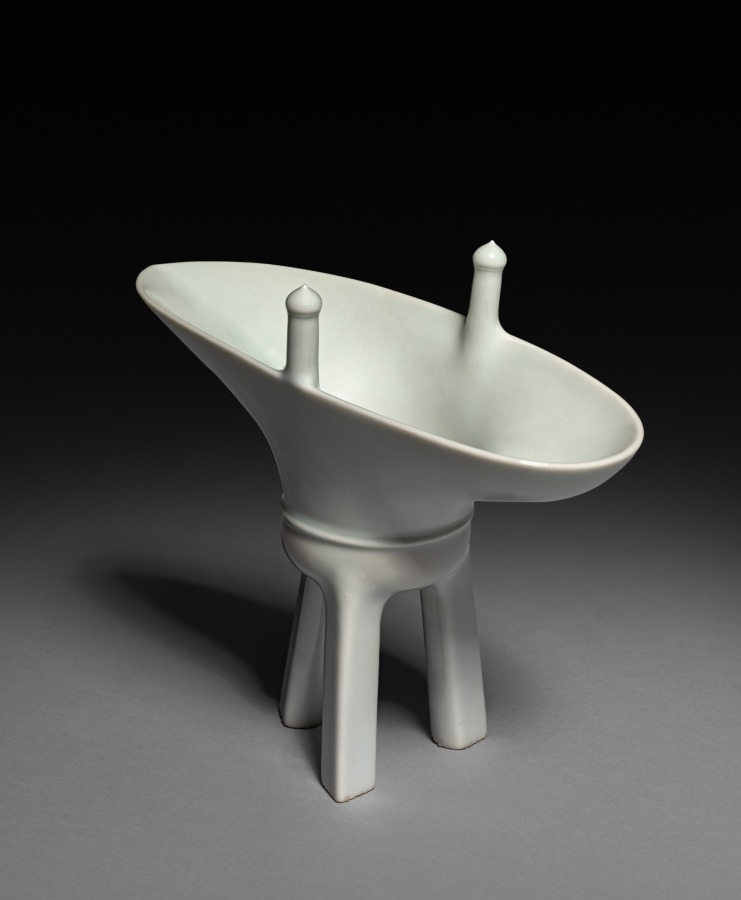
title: Libation Cup (Jue)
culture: China, Ming dynasty (1368-1644), Yongle reign (1402-1424)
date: 1402–1424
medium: glazed porcelain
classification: Ceramic